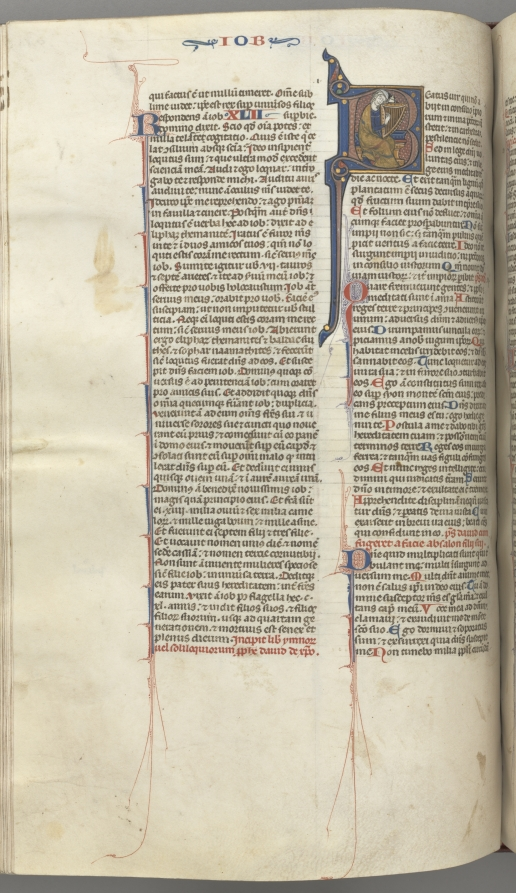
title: Fol. 214v, Psalm 1, historiated initial 8, David harping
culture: Southern France, Toulouse(?), 13th century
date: c. 1275–1300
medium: ink, tempera and gold on vellum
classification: Bound Volume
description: Biblical manuscripts were highly prized and important possessions of churches, monasteries, cathedral schools, and universities throughout medieval Europe. The biblical texts were known as the vulgate, the translations made by Saint Jerome in the fourth century from Hebrew and Greek into Latin, which became the definitive and official Latin version of the Roman Church. In the 13th century, the bible was, for the first time, produced as a single volume with an officially sanctioned sequence to its books and chapters as illustrated by this example. The very extensive decoration of this bible is arranged hierarchically to indicate the relative importance of the various texts so that full or almost full-page initials mark the openings of the first prologue, Genesis, and the first Gospel; historiated initials mark the beginning of each book and illuminated initials mark the Prologues.